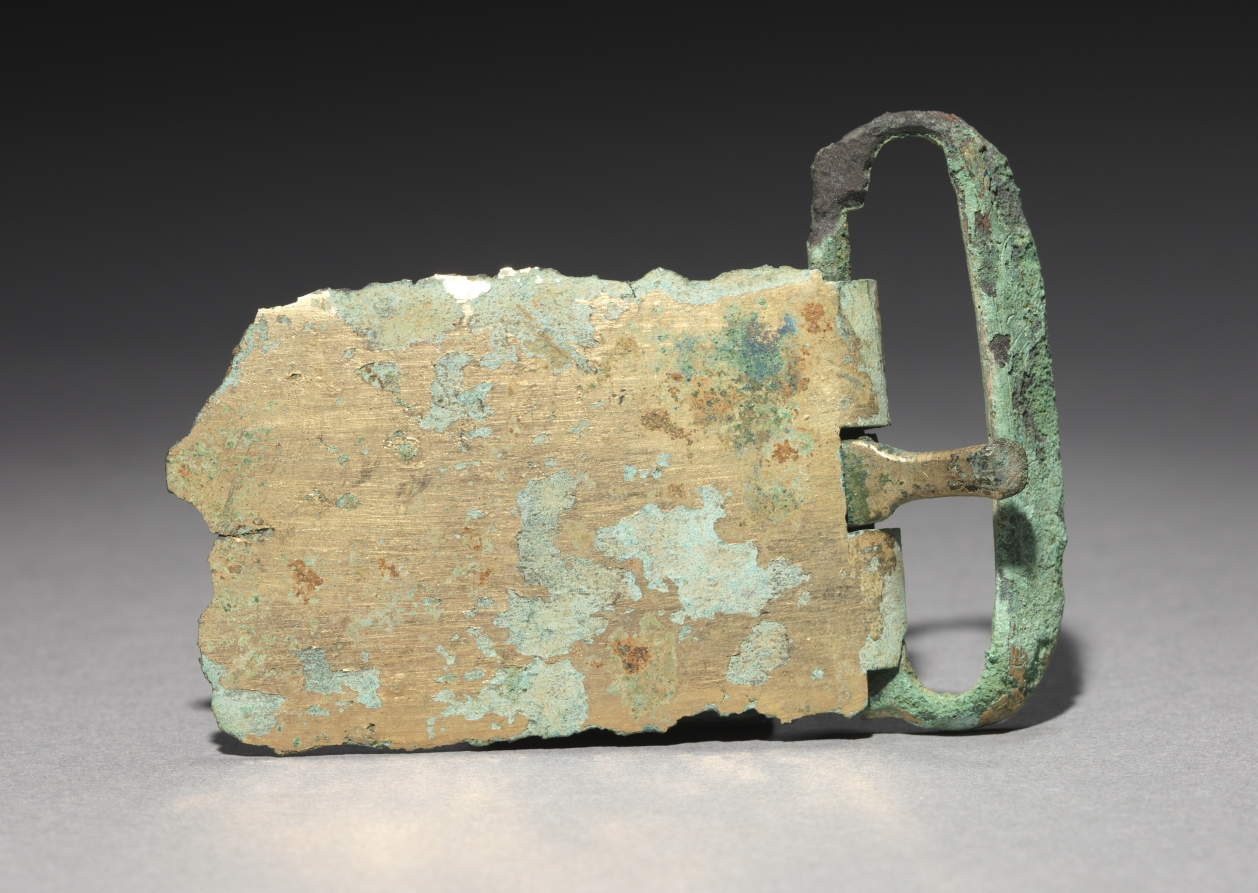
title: Belt Buckle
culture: Korea, Goryeo dynasty (918–1392)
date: 1100s-1200s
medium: bronze gilt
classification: Metalwork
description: Metallurgy advanced remarkably in the Goryeo period (918–1392), explaining why a large quantity of sophisticated metal artifacts with delicate designs were used not only as daily accessories but also as burial goods. Belt buckles like this one gilded with gold were fixed to leather belts.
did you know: The Japanese antique dealer Yamanaka & Company, which opened its branches in New York (1895) and Boston (1899), sold small Korean archaeological materials such as this belt buckle to American collectors in the early 20th century.